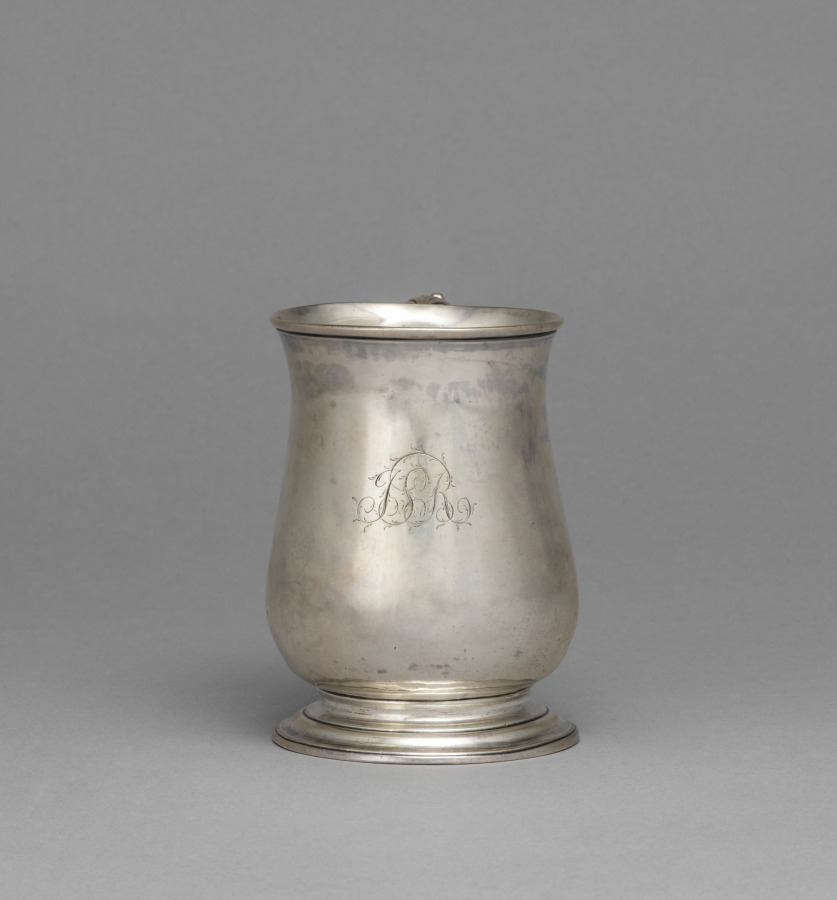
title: Cann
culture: America, Maryland, Baltimore, 18th century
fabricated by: Thomas Sparrow (American, 1746-)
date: c. 1770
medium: silver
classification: Silver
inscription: engraved "JSR" in foliate script on front, opposite handle.